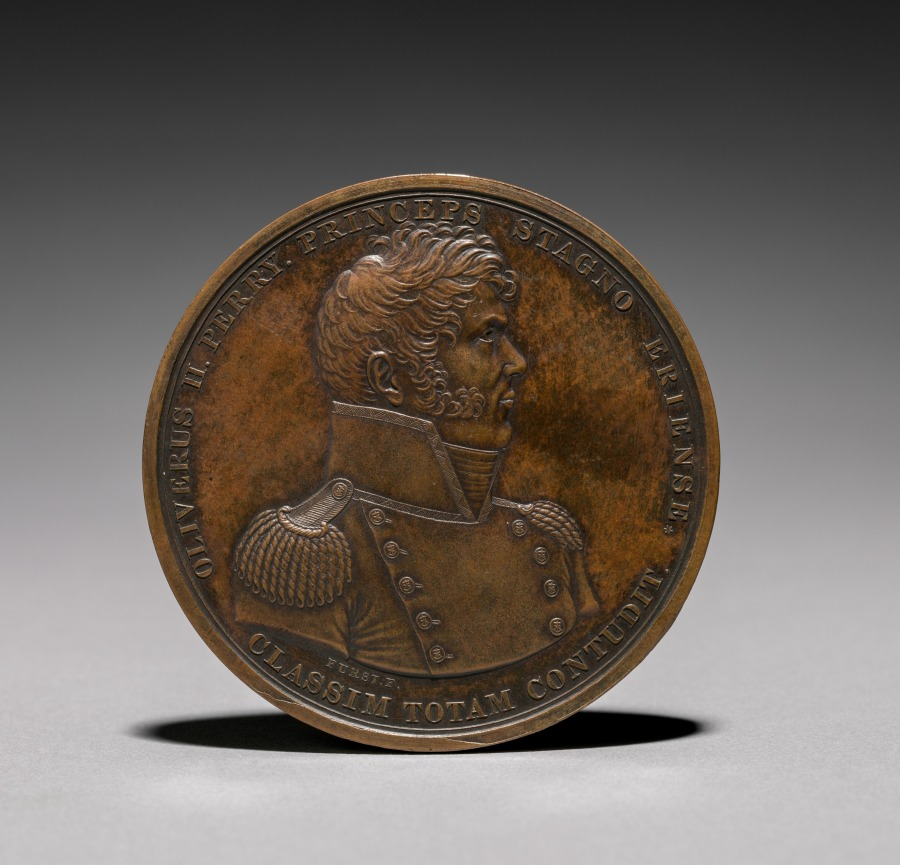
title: Medal Commemorating Commodore Oliver Hazard Perry (1785-1819) and the Battle of Lake Erie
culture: America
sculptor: Moritz Fürst (Hungarian, 1782–1882)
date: 1813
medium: bronze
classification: Metalwork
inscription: Oliverus H. Perry, Princips Stagno Eriense. blassim Totam Contudit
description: This medal commemorating the Battle of Lake Erie on 10 September 1813 is one of a series of 27 medals commemorating American successes during the War of 1812, struck by special resolution of Congress. These medals were awarded to naval commanders in gold and to their officers in silver. The bronze examples are restrikes.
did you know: The United States naval forces, led by Commodore Oliver Hazard Perry (1785-1819), won a decisive battle over the British.